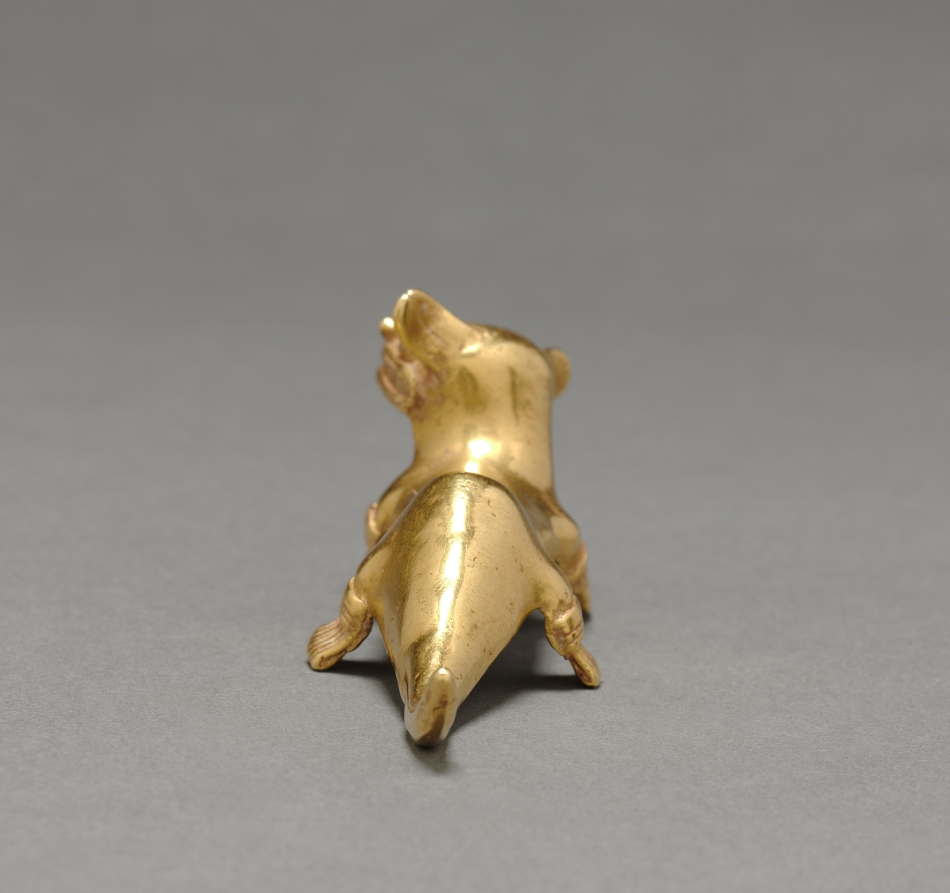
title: Feline Pendant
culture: Western Panama, Veraguas-Gran Chiriquí Style, 10th-16th century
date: c. 1000–1550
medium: cast gold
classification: Metalwork